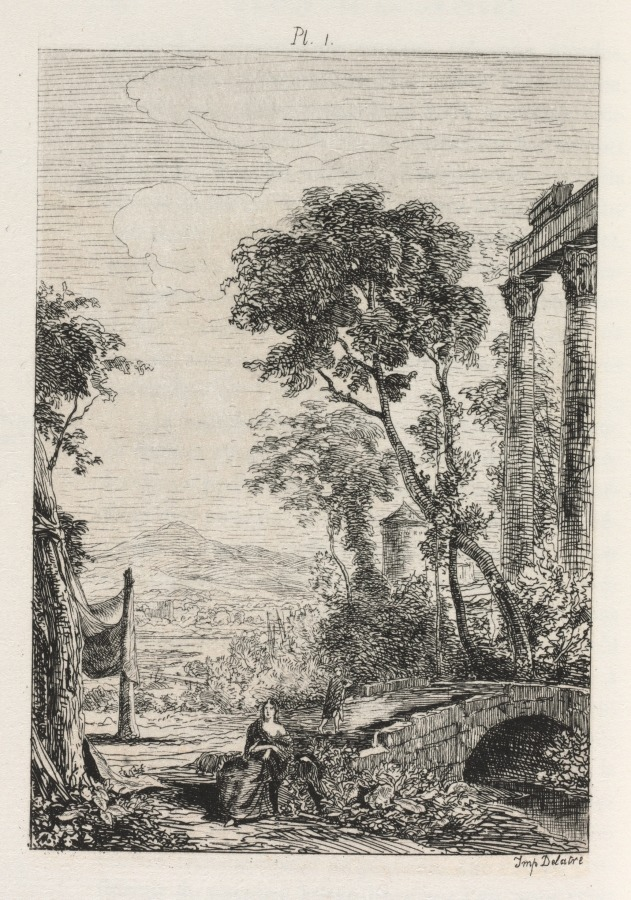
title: Traité de La Gravure a l’eau forte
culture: France, 19th century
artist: Maxime Lalanne (French, 1827–1886)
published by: Cadart et Luquet, Paris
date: 1866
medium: book containing 4 etchings by Maxime Lalanne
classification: Bound Volume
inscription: On first page annotated in pencil: J. H. Maghee 1874